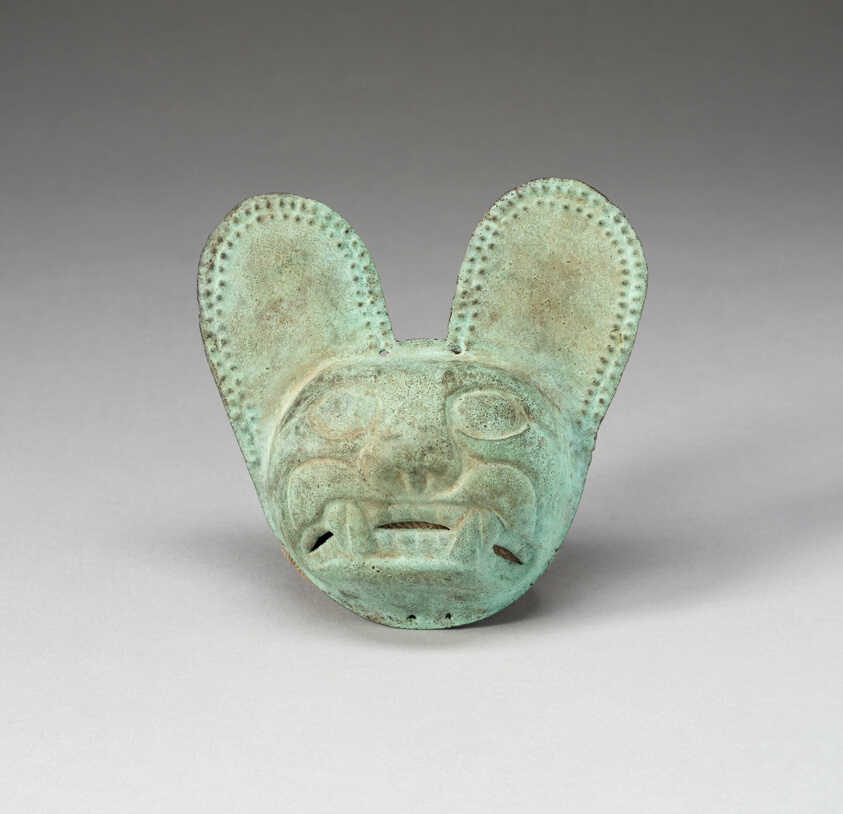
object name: Mask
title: Feline Mask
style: moche, mochica, early intermediate period, Pre-Columbian, americas, Arts of the Americas, andean, andes, south american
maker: Moche (North Coast, Peru)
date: 100 BCE–500 CE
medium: Copper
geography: Peruvian North Coast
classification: metal; masks; art of the americas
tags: masks